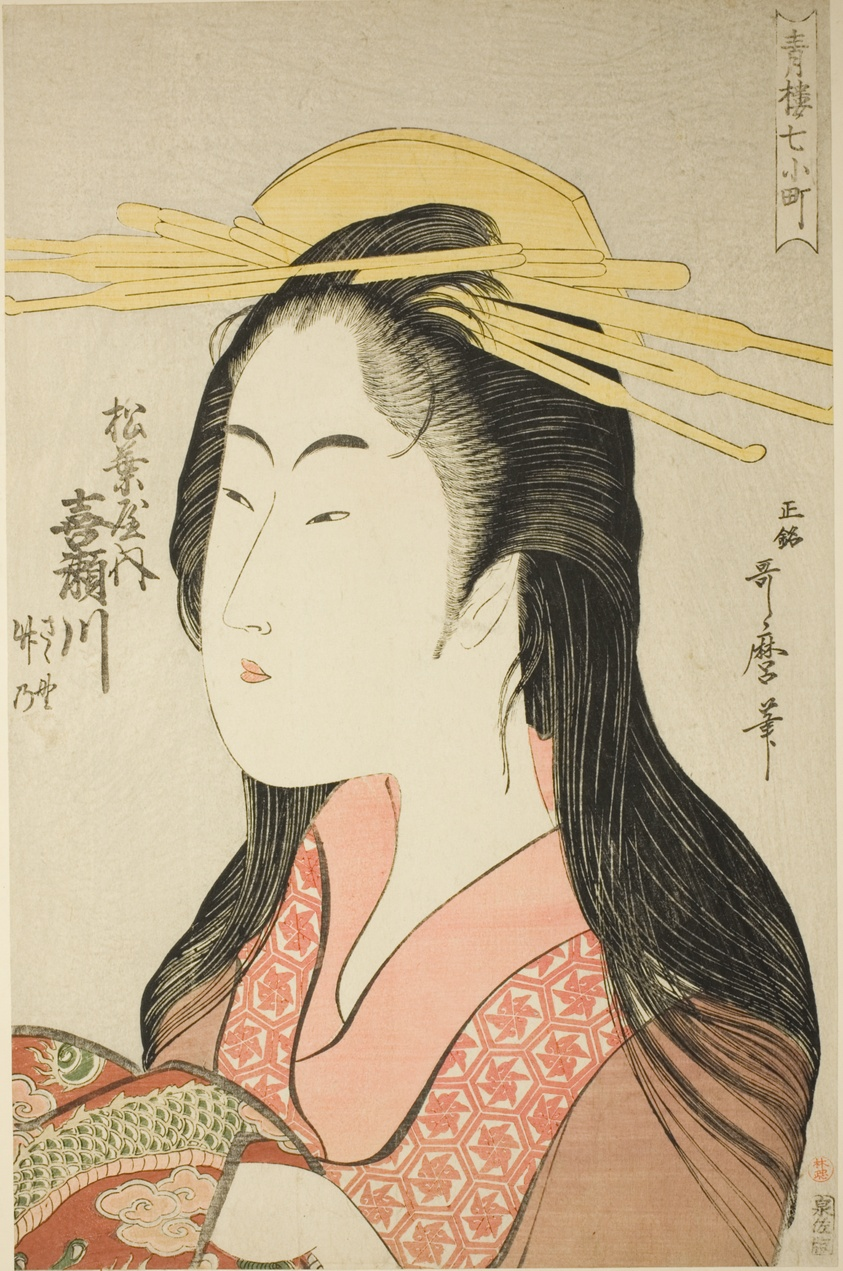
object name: Print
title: Kisegawa of the Matsubaya, [whose attendants are] Sasano, Takeno (Matsubaya uchi Kisegawa, Sasano, Takeno), from the series “Seven Komachi of Yoshiwara” ("Seiro nana Komachi")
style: Japanese (culture or style)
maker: Kitagawa Utamaro 喜多川 歌麿; Japanese, 1753 (?)-1806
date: c. 1794/95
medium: Color woodblock print; oban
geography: Japan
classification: woodblock print; print; asian art